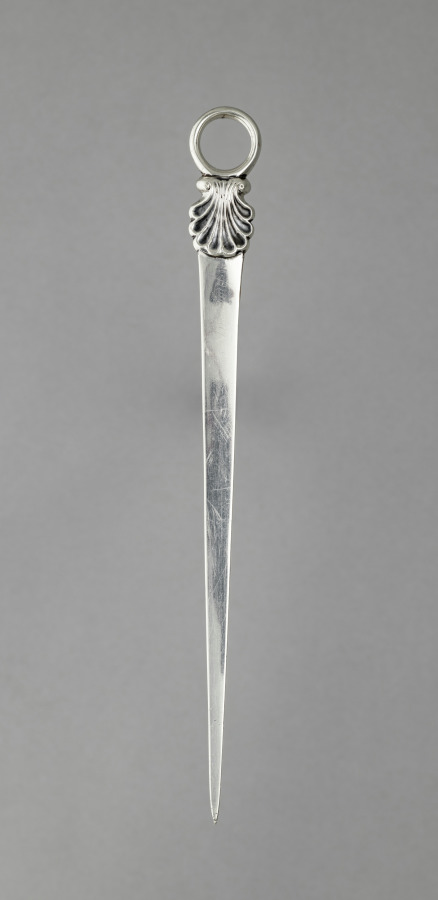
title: Skewer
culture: England, 18th century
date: c. 1760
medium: silver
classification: Silver